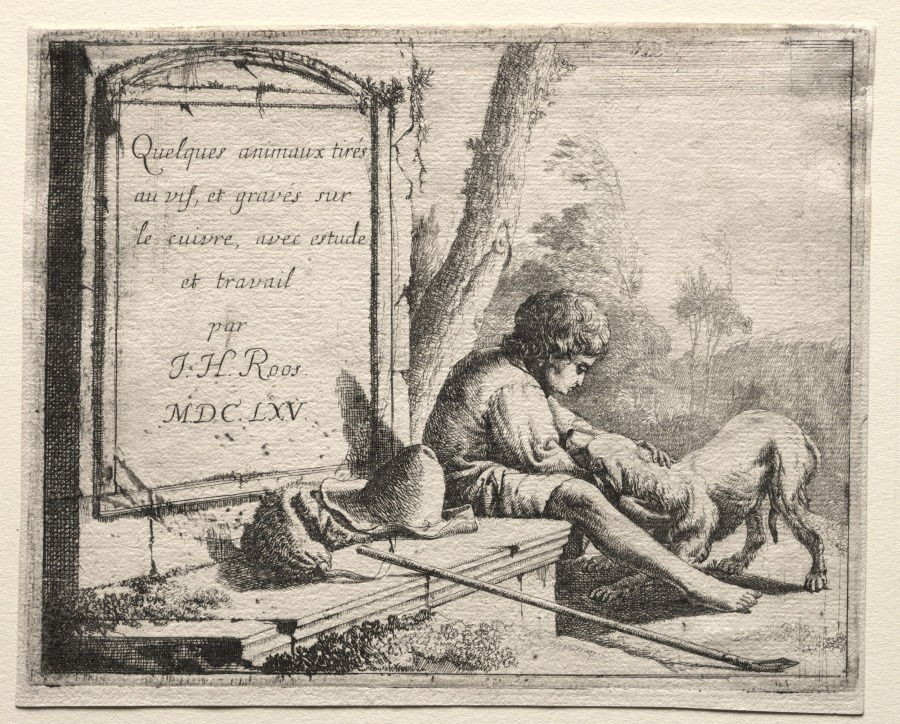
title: Johann Heinrich Roos Shepherding (series)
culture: Germany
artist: Johann Heinrich Roos (German, 1631–1685)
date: 1665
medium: etching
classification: Print